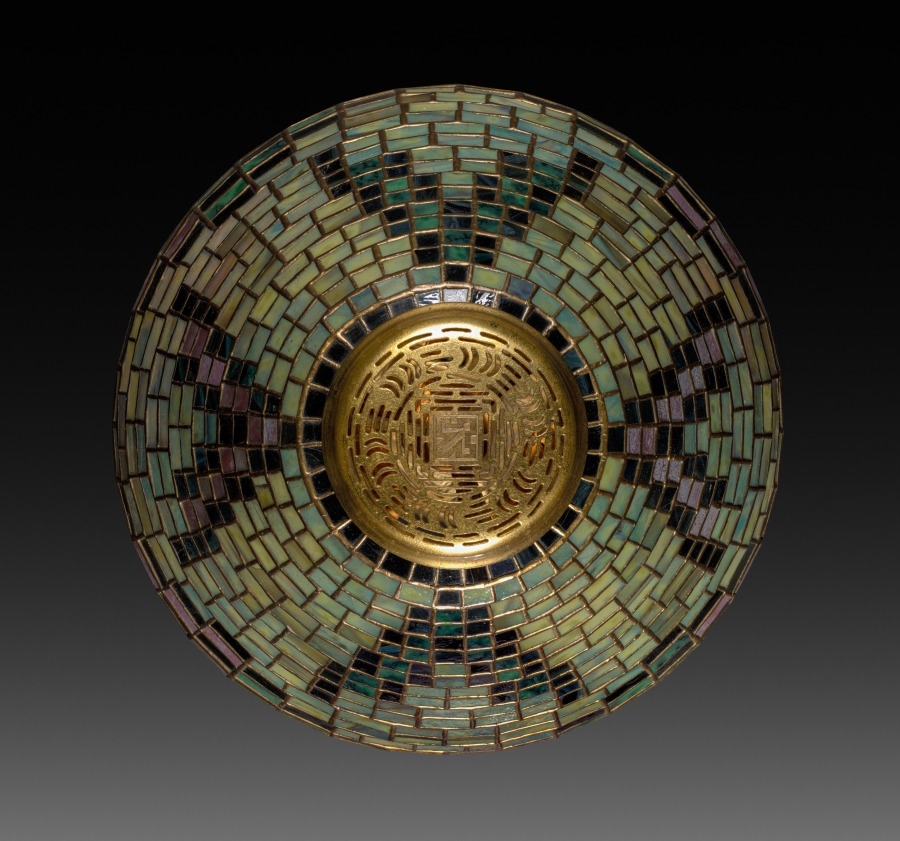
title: Indian Basket Lamp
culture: America, New York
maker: Tiffany Studios (United States, New York, 1902–32)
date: c. 1902–10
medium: Leaded glass, gilt bronze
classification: Lamp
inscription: inside bottom rim of shade: Tiffany Studios New York 1586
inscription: stamped on underside of base: Tiffany Studios/New York/536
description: An admirer of Native American art, Louis Comfort Tiffany amassed a personal collection of textiles, baskets, and pottery, from which he and his designers drew inspiration. He was particularly interested in the way basket weavers formed their patterns using geometric grids, a look he re-created in designs for lamps, such as the Indian Basket lamp.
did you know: This lamp features dichroic glass, which appears green in reflected light but glows amber when illuminated.